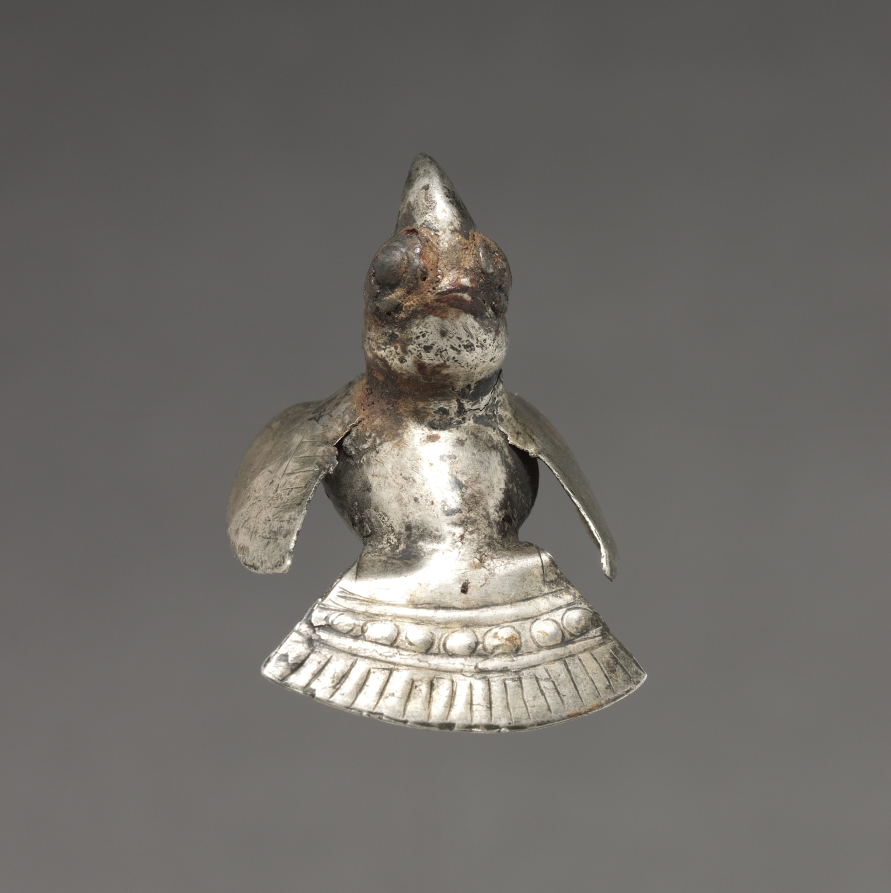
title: Macaw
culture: Peru, North Coast, Sicán or Chimú, 9th-15th Century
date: c. 800–1470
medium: gold alloy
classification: Metalwork